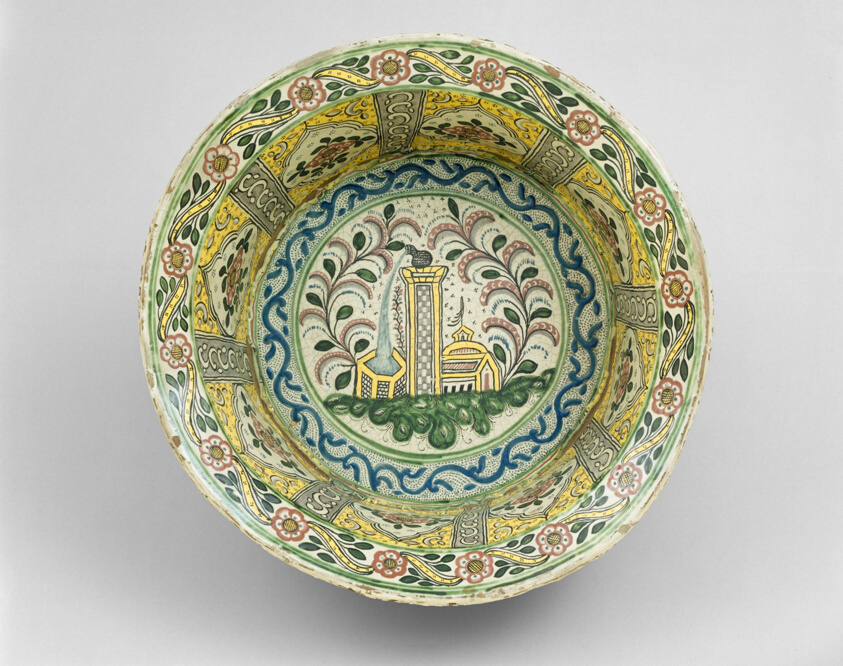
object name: Vessel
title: Basin Depicting a Cistern, Tower and Domed Building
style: Folk Art, spanish colonial, european, Arts of the Americas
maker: Talavera poblana; Puebla, Mexico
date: 1775–1825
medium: Tin-glazed earthenware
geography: Puebla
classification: earthenware; european decorative arts; ceramics; vessel; art of the americas